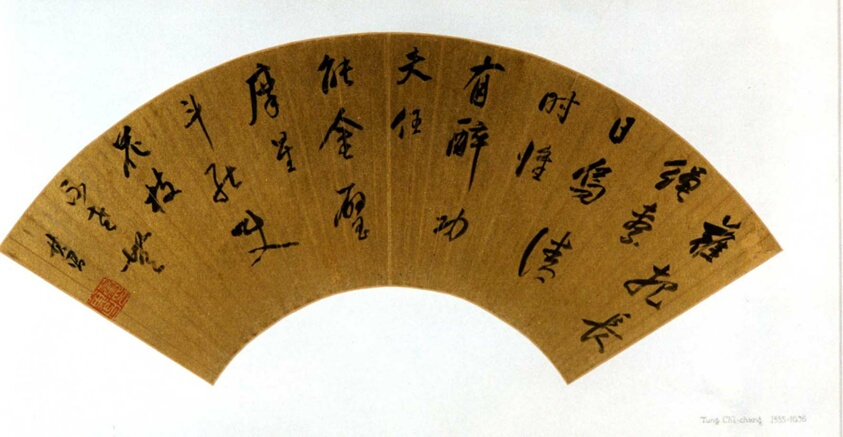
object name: Painting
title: Calligraphy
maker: Attributed to Dong Qichang (Chinese, 1555-1636)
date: 1555–1636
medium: Folding fan mounted as an album leaf; ink on gold paper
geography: China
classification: album leaf; painting; asian art